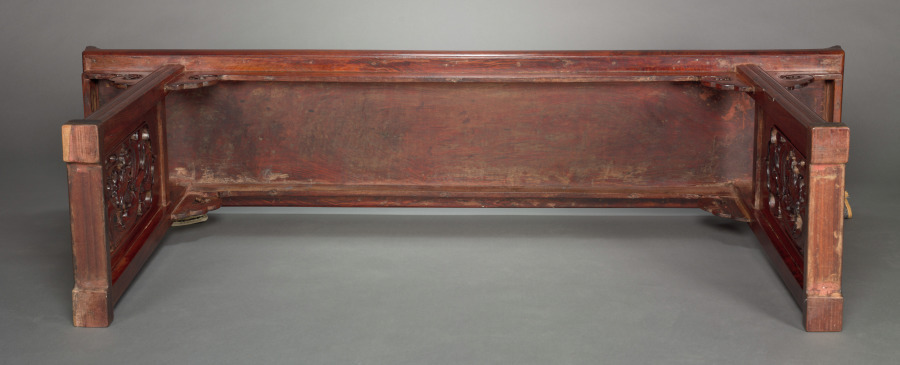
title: Side Table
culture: China, Ming dynasty (1368-1644) or Qing dynasty (1644-1911)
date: 1600s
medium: Rosewood (huanghuali)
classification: Furniture and woodwork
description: Long, rectangular tables were often placed against a wall to hold candlestands, flower vases, or incense burners. It was customary to hang ancestor portraits, images of religious figures, or seasonal paintings above the table that would convey auspicious wishes and blessings to the family. The high legs show stylized cloud-shaped spandrels. At each end of the table, between the recessed legs, are carved openwork panels with a lively dragon motif.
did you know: The table top is made of a single plank of wood.